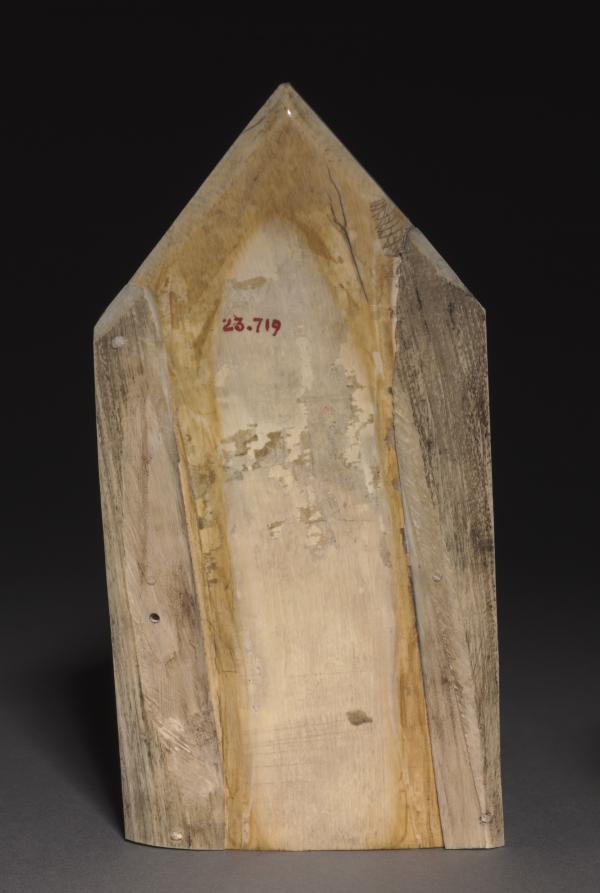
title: Plaque: The Virgin and Child with Angels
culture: France, Paris, Gothic period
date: c. 1320–1330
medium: ivory, traces of paint and gilding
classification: Ivory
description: This plaque once formed the center of an ivory triptych, a devotional object consisting of three panels hinged together. While two standing angels with candlesticks flank the enthroned Virgin on either side, a third angel descends from above to crown the Virgin as Queen of Heaven.